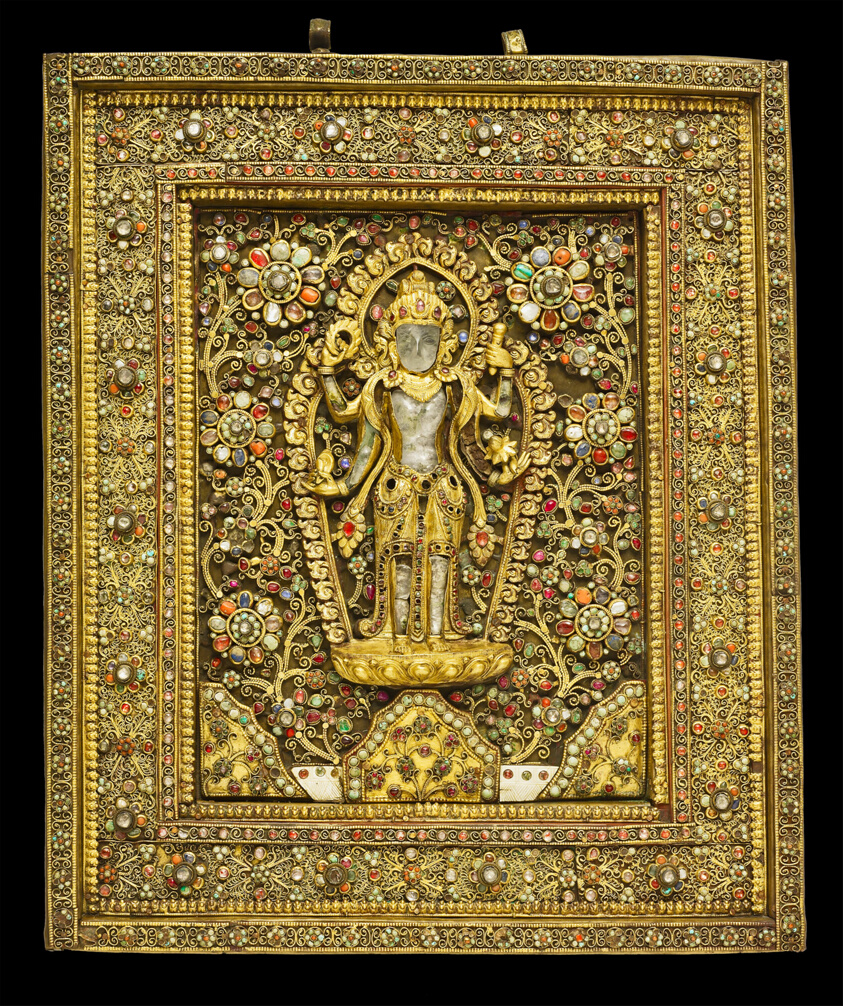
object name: Religious/Ritual Object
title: Votive Plaque with God Vishnu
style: Himalayan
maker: Nepal; Kathmandu Valley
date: 19th century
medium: Gilt bronze with ivory, semiprecious stones, crystal, and glass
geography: Kathmandu Valley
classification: bronze; metal; sculpture; asian art; ritual objects